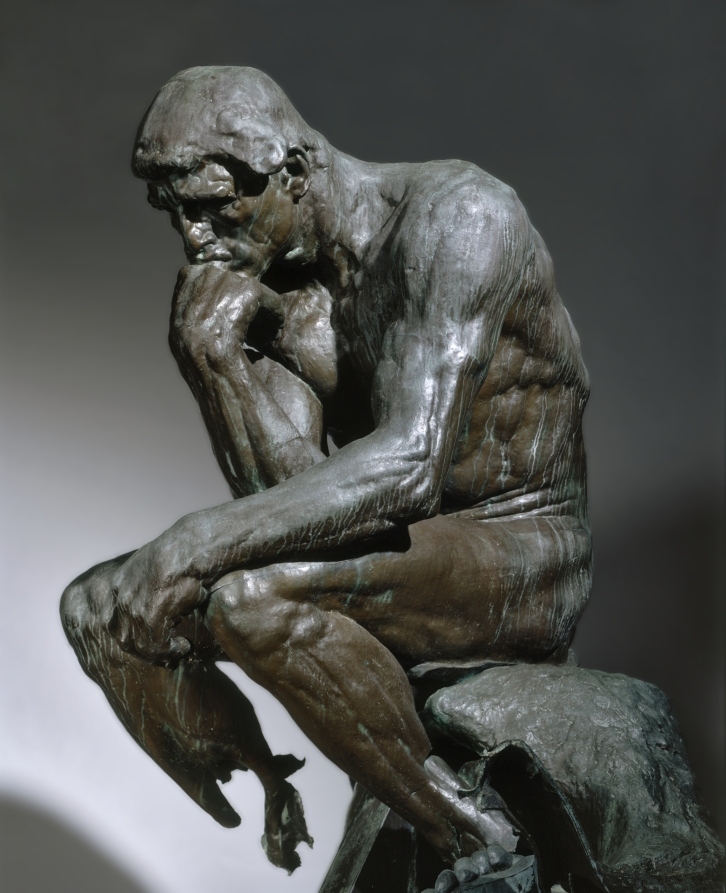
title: The Thinker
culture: France, 19th century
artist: Auguste Rodin (French, 1840–1917)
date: 1880–81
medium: bronze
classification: Sculpture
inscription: signed on base near sinister foot: "A. Rodin."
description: The Thinker was first developed as part of Rodin's The Gates of Hell, a sculptured doorway for a proposed museum of decorative arts in Paris. Intended to be part of a relief directly above the doors, the rugged figure was originally conceived as a generalized image of the Italian poet Dante Alighieri (1265–1321), who wrote the Divine Comedy.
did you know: This enlarged version of The Thinker is one of less than 10 cast during Rodin's lifetime.